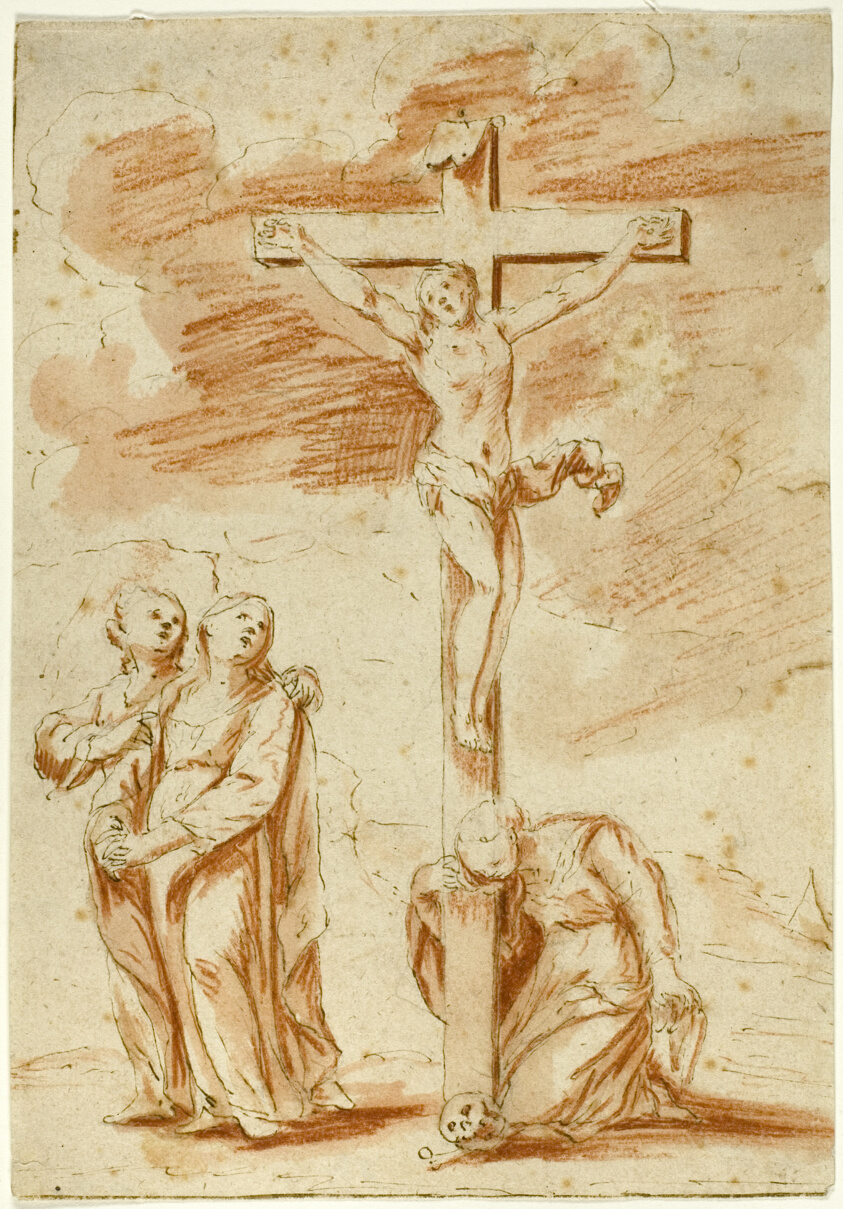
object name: Drawing and Watercolor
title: Crucifixion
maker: Unknown artist; Genovese, 18th century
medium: Pen and brown ink, red chalk, and red chalk wash on cream laid paper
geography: Italy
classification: chalk; drawings (visual works); prints and drawing